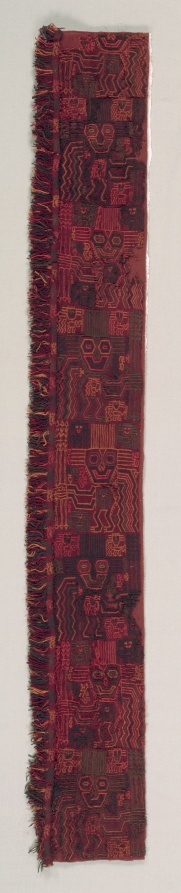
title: Mantle Border Fragment with Oculate Being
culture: Peru, South Coast, Paracas (Cavernas) style (700 BCE–1 CE)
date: 200 BCE–200 CE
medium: camelid fiber, embroidery over foundation cloth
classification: Embroidery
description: This border fragment features a supernatural being apparently at the center of a religion that swept the south coast during the final stages of the Paracas culture. Known as the Oculate Being after its huge eyes, it is affiliated with fertility and violence—note the darts it holds in one hand. Both large and small versions of the being are embroidered on the fragment, which likely comes from the border of a large, rectangular, shawl-like garment known as a mantle.